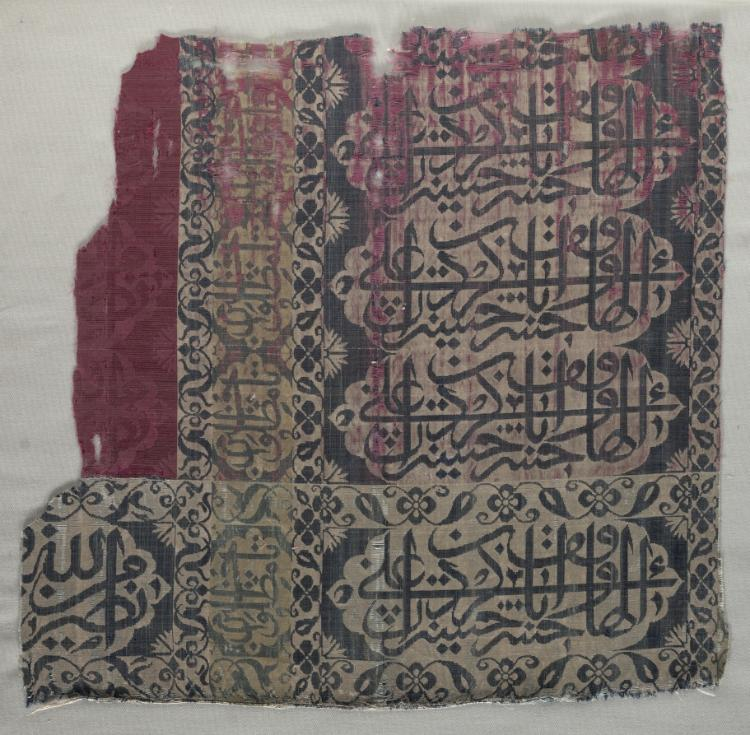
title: Fragment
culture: Iran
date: 1500s–1600s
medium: Silk: damask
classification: Textile